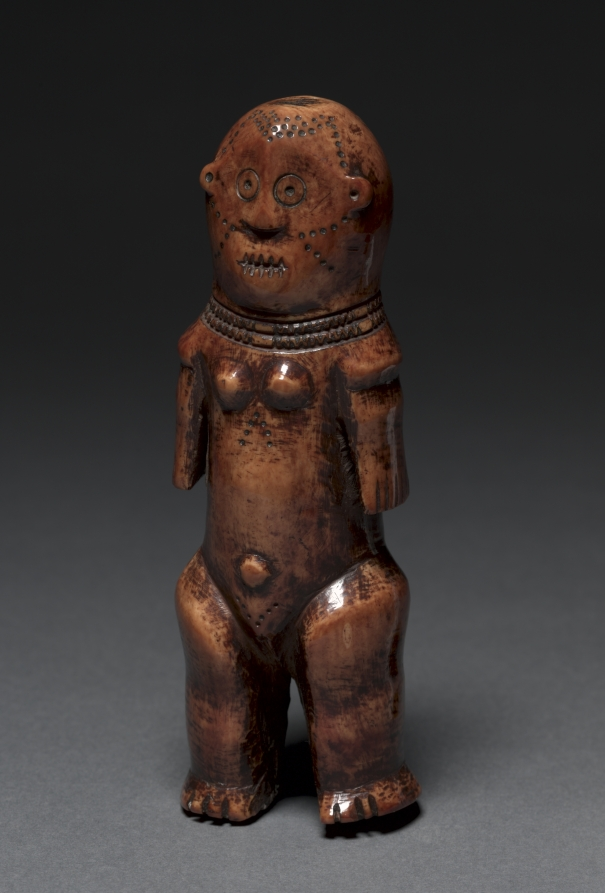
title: Figure (iginga)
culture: Africa, Central Africa, Democratic Republic of Congo, Lega-style maker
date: probably 1800s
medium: Elephant ivory, tukula, and oil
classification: Sculpture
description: The life of Lega men and women is structured around their advancement through the different grades of the Bwami association. Fulfilling political, social, religious, and other roles, the members’ ultimate purpose is the pursuit of wisdom and excellence. Ivory figurines were reserved for members of the two highest Bwami grades, in which the core of the Lega’s moral philosophy is revealed.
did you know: The dark surface (patina) of this sculpture comes from years of handling and the application of oil and a red powder called tukula; it was originally cream-colored!